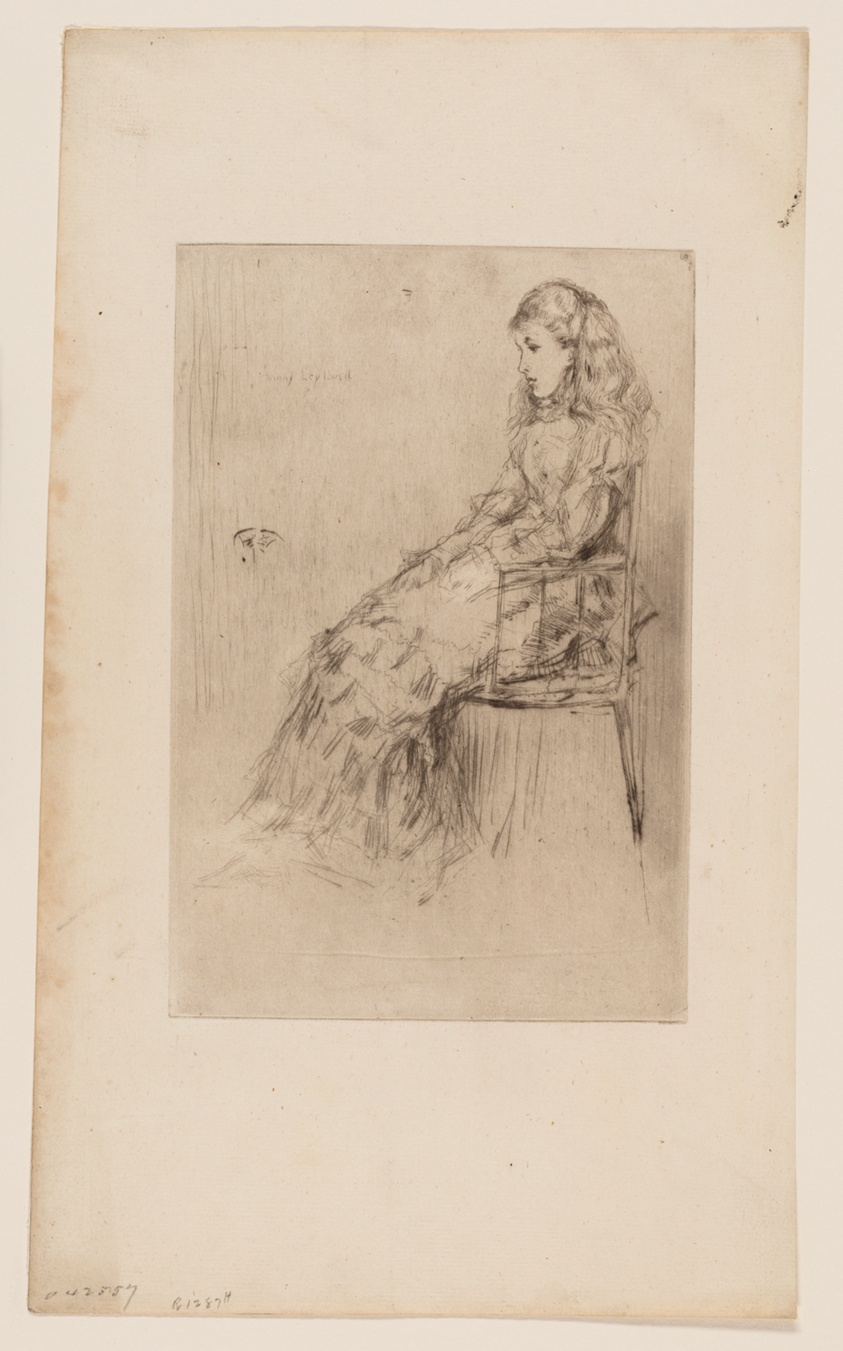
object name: Print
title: Fanny Leyland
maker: James McNeill Whistler (American, 1834-1903)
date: 1874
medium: Drypoint in black ink on ivory laid paper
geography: United States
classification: drypoint; print; prints and drawing; paper